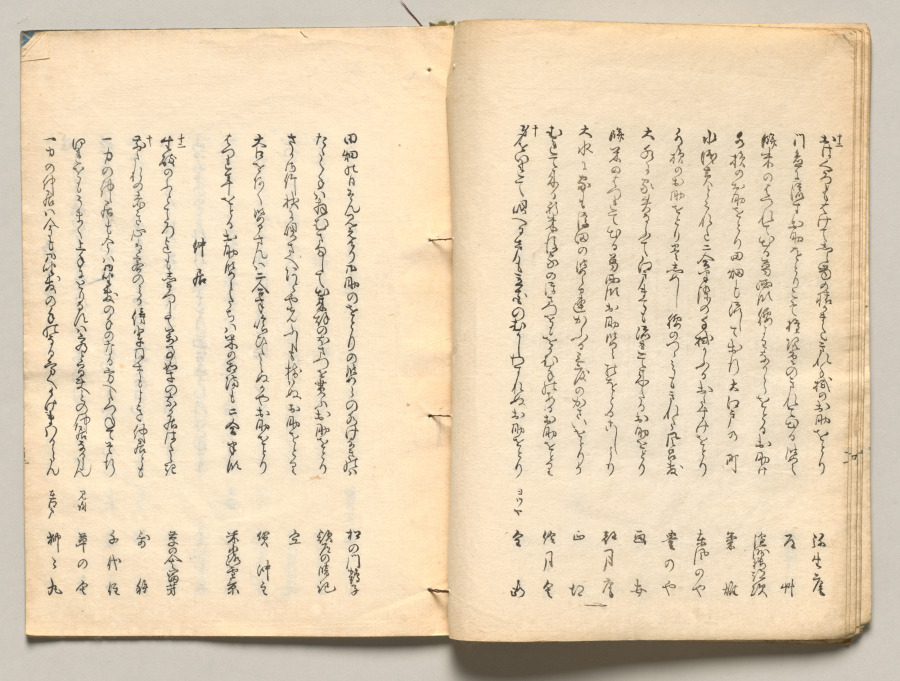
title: Spread Twenty from Volume Four of People of Japan in Light Verse (Kyōka)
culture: Japan, Edo period (1615–1868)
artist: Utagawa Hiroshige (Japanese, 1797–1858)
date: 1857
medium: Woodblock-printed book; ink and color on paper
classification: Bound Volume